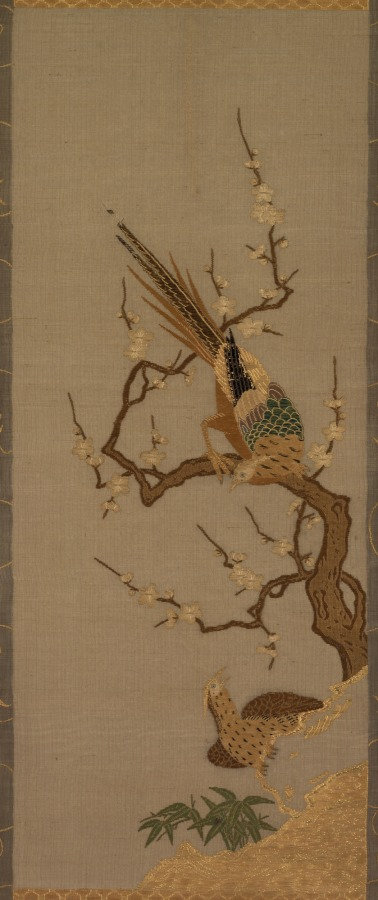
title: Birds in a Tree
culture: Japan, Edo period (1615–1868)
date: c. 1700–1868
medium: hanging scroll; silk gauze brocaded with gold and silk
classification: Textile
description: This scene of two Chinese pheasants with a flowering plum tree (a sign of the arrival of spring in Japan) is not painted. All the lines and surfaces are created by colored threads carefully stitched together into the silk. Consequently, the surface appears quite different from paintings on paper.